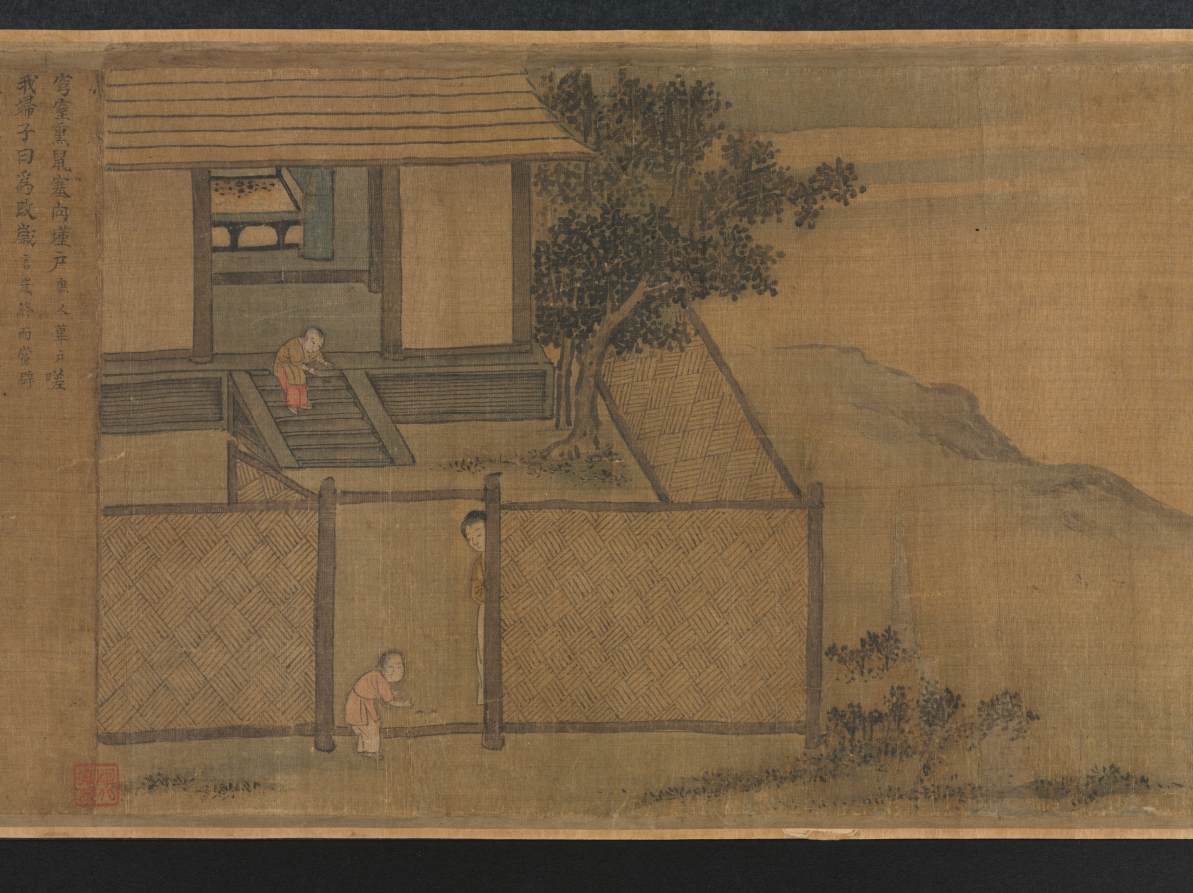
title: "Seventh Month" from the Odes of Bin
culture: China, Southern Song dynasty (1127-1279)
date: 1200s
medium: Handscroll; ink and color on silk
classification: Painting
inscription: Colophons: 1. [on the frontispiece] by the Qianlong emperor (dated 1741). 2. by Lu Wan (dated Zhengde dingchou, 1517). 2. by the Jiaqing emperor (dated 1807).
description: According to Confucian thought, the ruler looks after the well-being of his people which involves agricultural activities. Seventh Month from the ancient Odes of Bin in the Shijing (Book of Poetry) describes occupations throughout the year, including plowing, harvesting, hunting, making clothes, and observing rituals. The earliest illustrations of these Odes accompanied by text were commissioned by Southern Song emperor Gaozong (reigned 1127–1162). As the lower Yangzi delta had become the new seat of government, Gaozong had sets of these illustrations produced by court artists to revive the dynasty and convince the Confucian officialelite of his legitimacy to rule.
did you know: The Odes of Bin appears in the classic Shijing (Book of Poetry), an anthology of more than 300 poems, folk songs, and ceremonial hymns that were originally chanted to music.